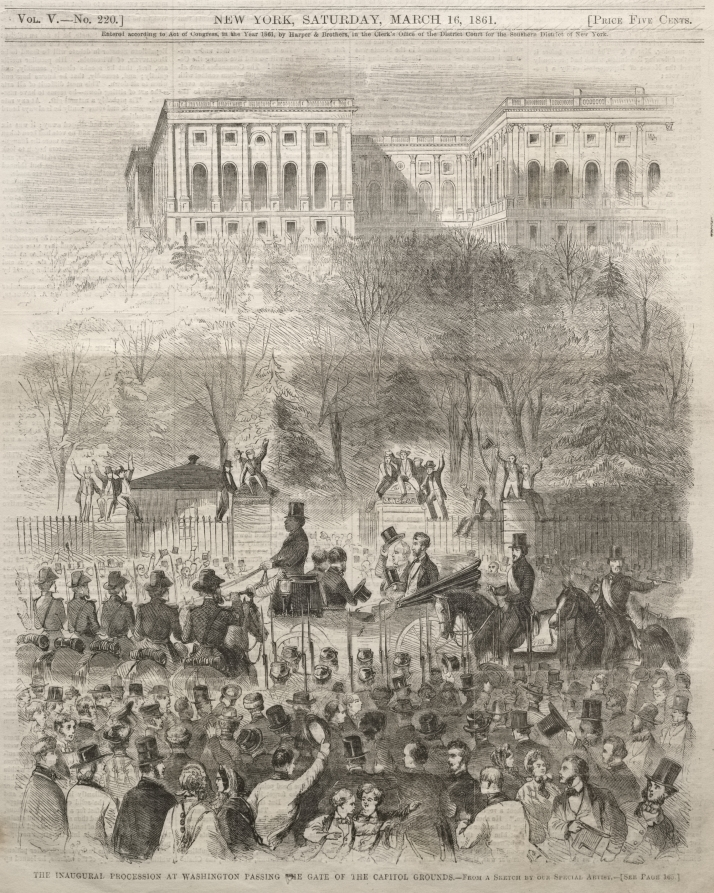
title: The Inaugural Procession at Washington Passing the Gate of the Capital Grounds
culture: America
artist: Winslow Homer (American, 1836–1910)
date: 1861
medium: wood engraving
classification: Print